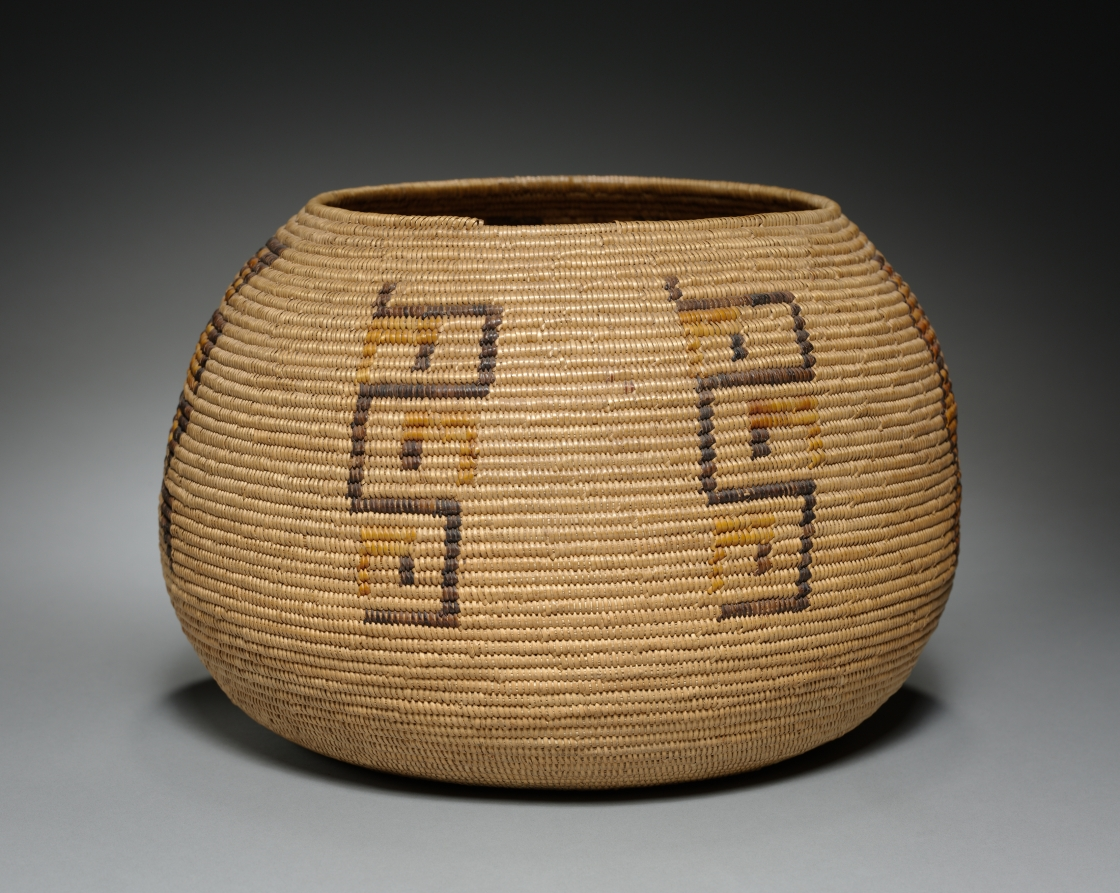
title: Gift Basket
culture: California, Cahuilla (Mission, Saboba Mission), Unassigned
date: c. 1900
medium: Juncus, sumac; coiled, deergrass bundle foundation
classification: Basketry